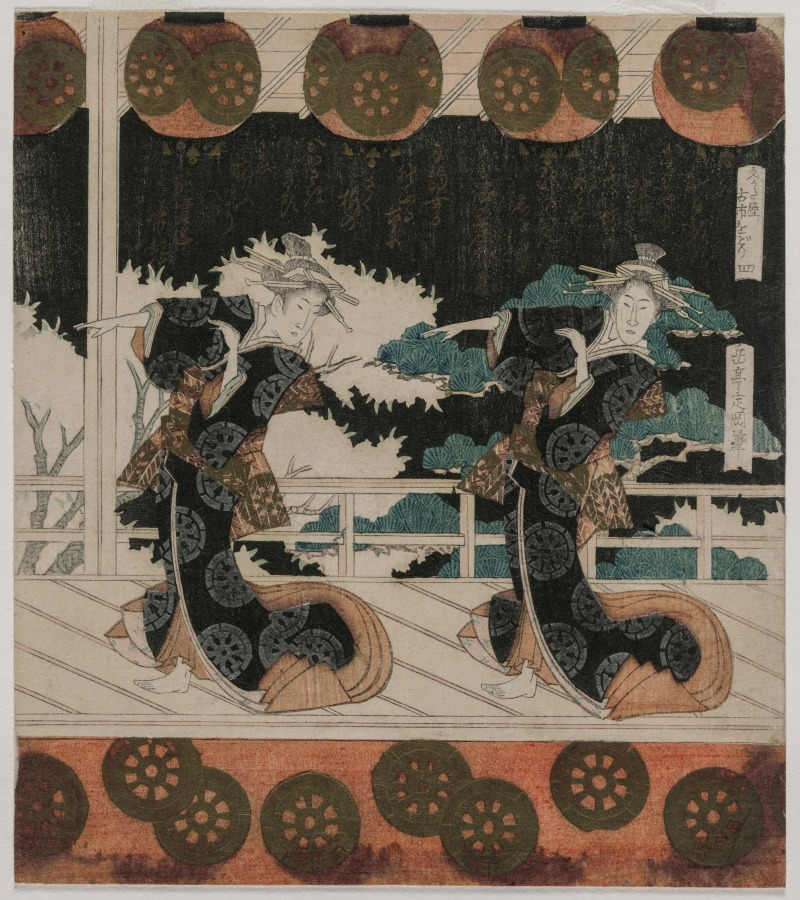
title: Furuichi Dance at the Hisagataya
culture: Japan, Edo period (1615–1868)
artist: Gakutei Harunobu (Japanese, 1786(?)–1868)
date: mid 1820s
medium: fourth of a pentaptych of woodblock prints; ink and color on paper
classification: Print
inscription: Signature: Gakutei Sadaoka hitsu